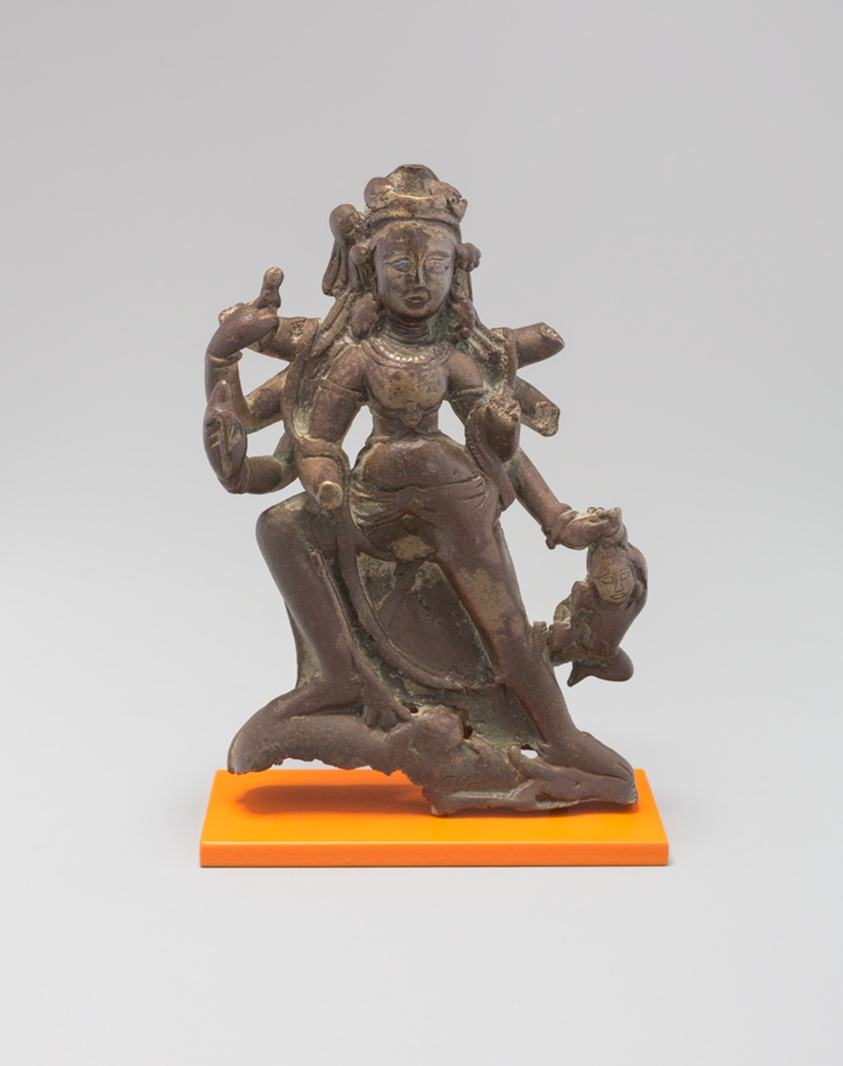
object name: Sculpture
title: Goddess Durga Slaying the Buffalo Demon (Mahishasuramardini)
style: South Asian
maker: India; Kashmir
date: 9th/10th century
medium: Brass inlaid with silver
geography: Kashmir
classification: bronze; metal; sculpture; asian art